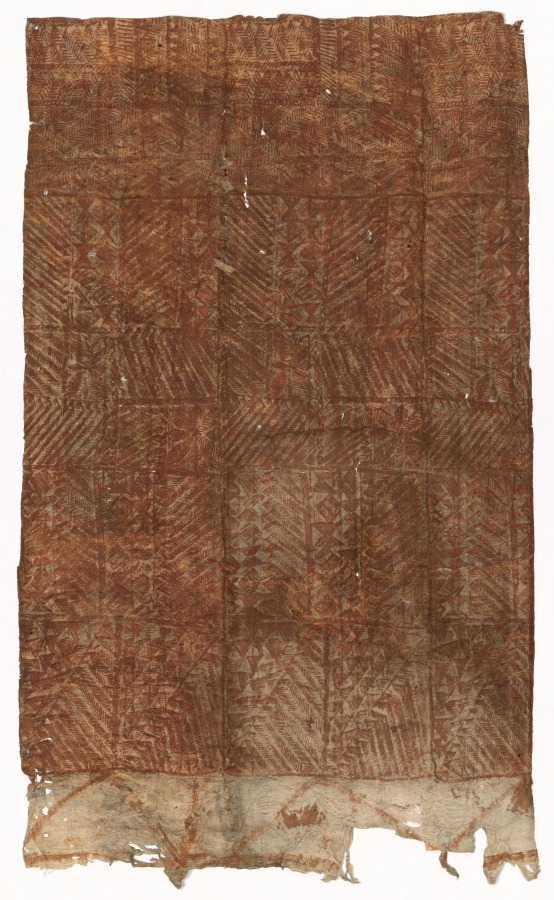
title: Panel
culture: Oceania, Polynesia, Samoa ?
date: early 1800s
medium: tapa cloth, printed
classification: Textile